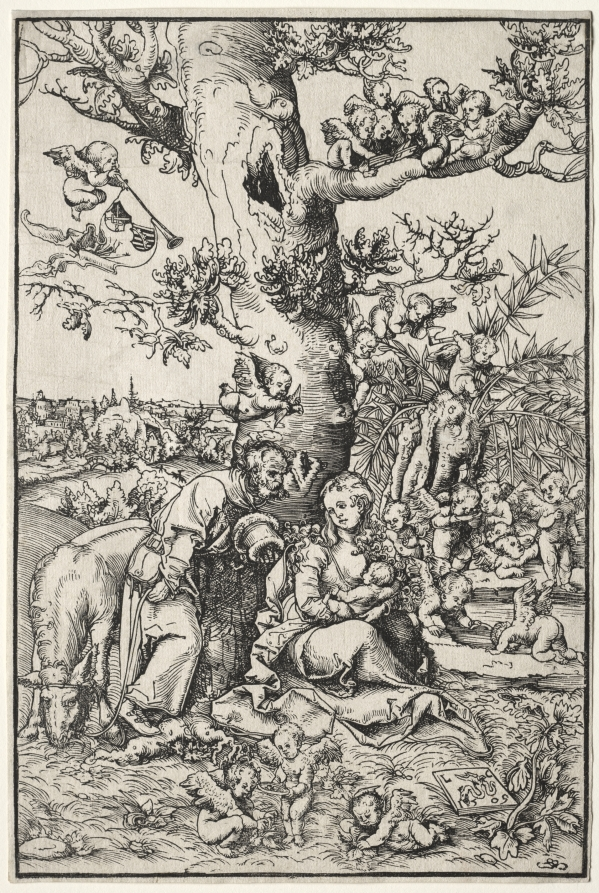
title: Rest on the Flight into Egypt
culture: Germany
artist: Lucas Cranach (German, 1472–1553)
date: 1509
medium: woodcut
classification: Print